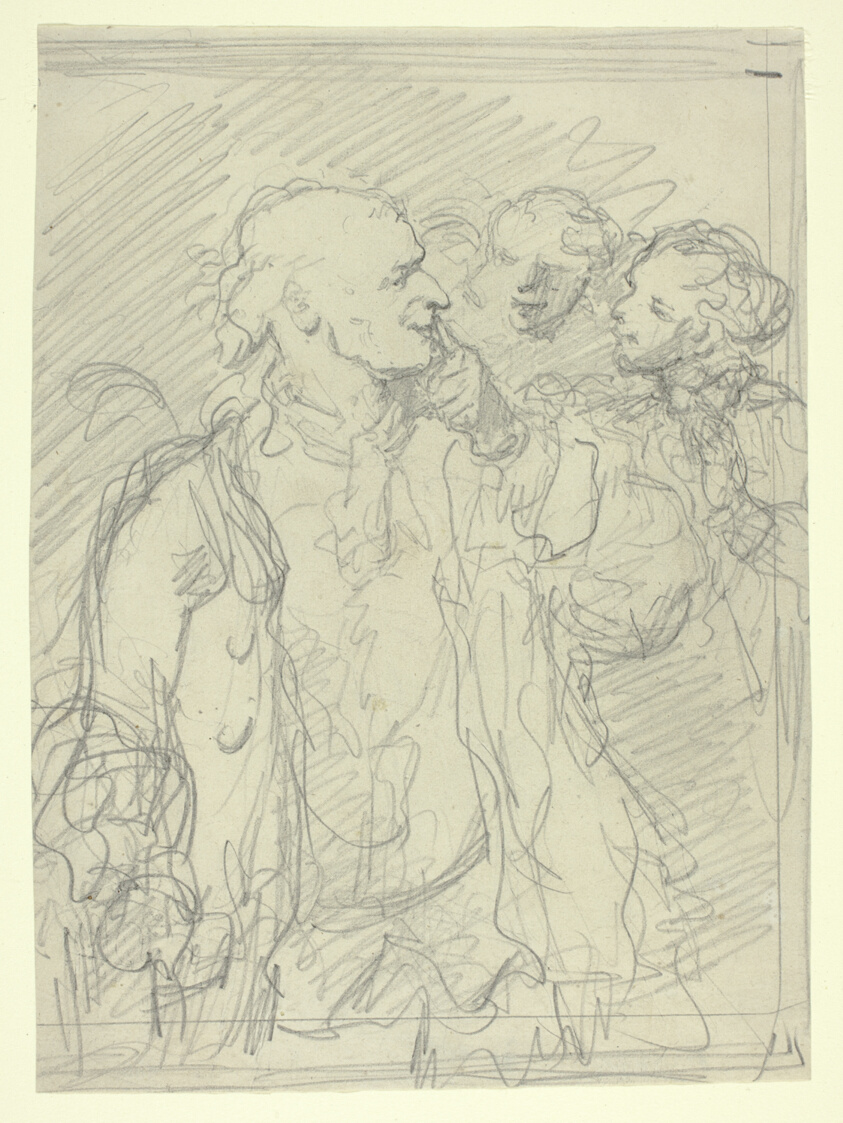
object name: Drawing and Watercolor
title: A Gentleman and Two Companions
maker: Celestin Nanteuil (French, 1813-1873)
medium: Graphite on buff wove paper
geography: France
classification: graphite; drawings (visual works); prints and drawing